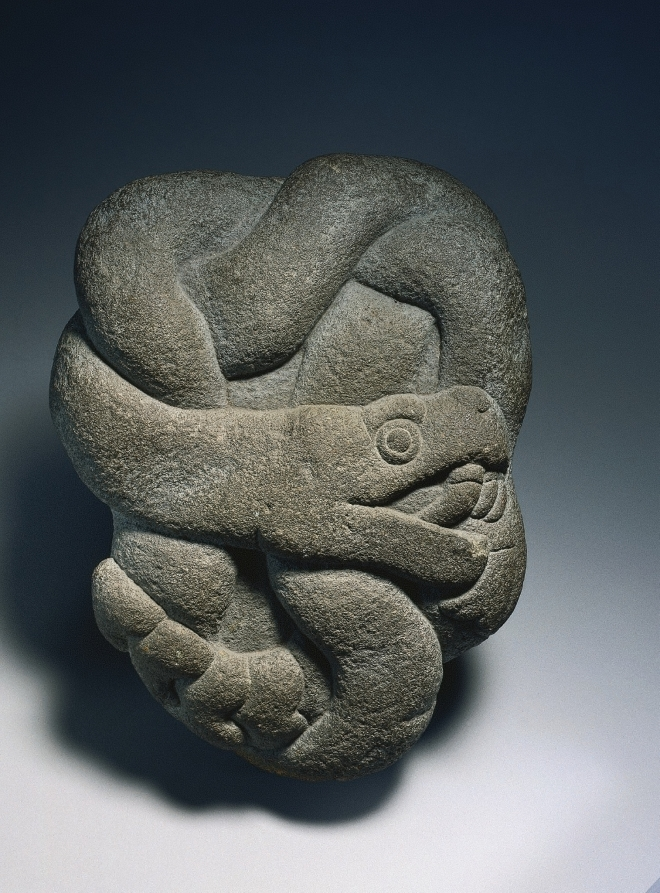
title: Coiled Rattlesnake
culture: Central Mexico, Aztec, 13th-16th century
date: c. 1200–1519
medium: stone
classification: Sculpture